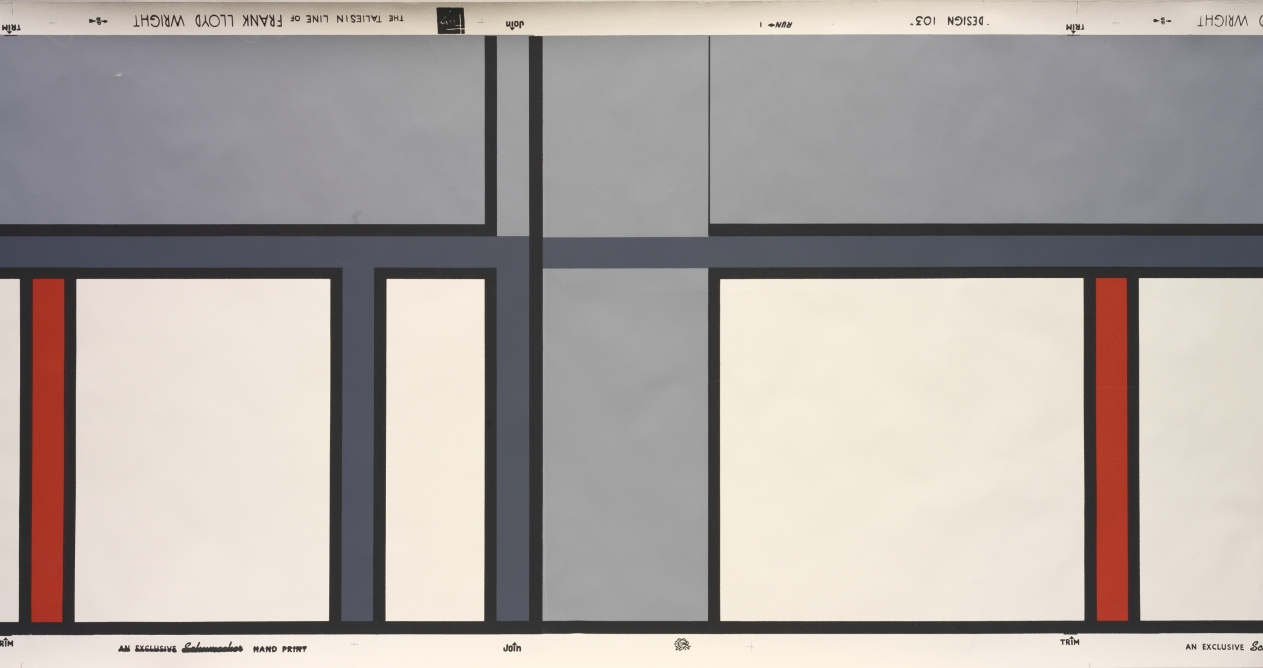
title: Design 103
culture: America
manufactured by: F. Schumacher and Co. (American)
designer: Frank Lloyd Wright (American, 1867–1959)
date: before 1959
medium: silkscreen on wallpaper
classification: Print